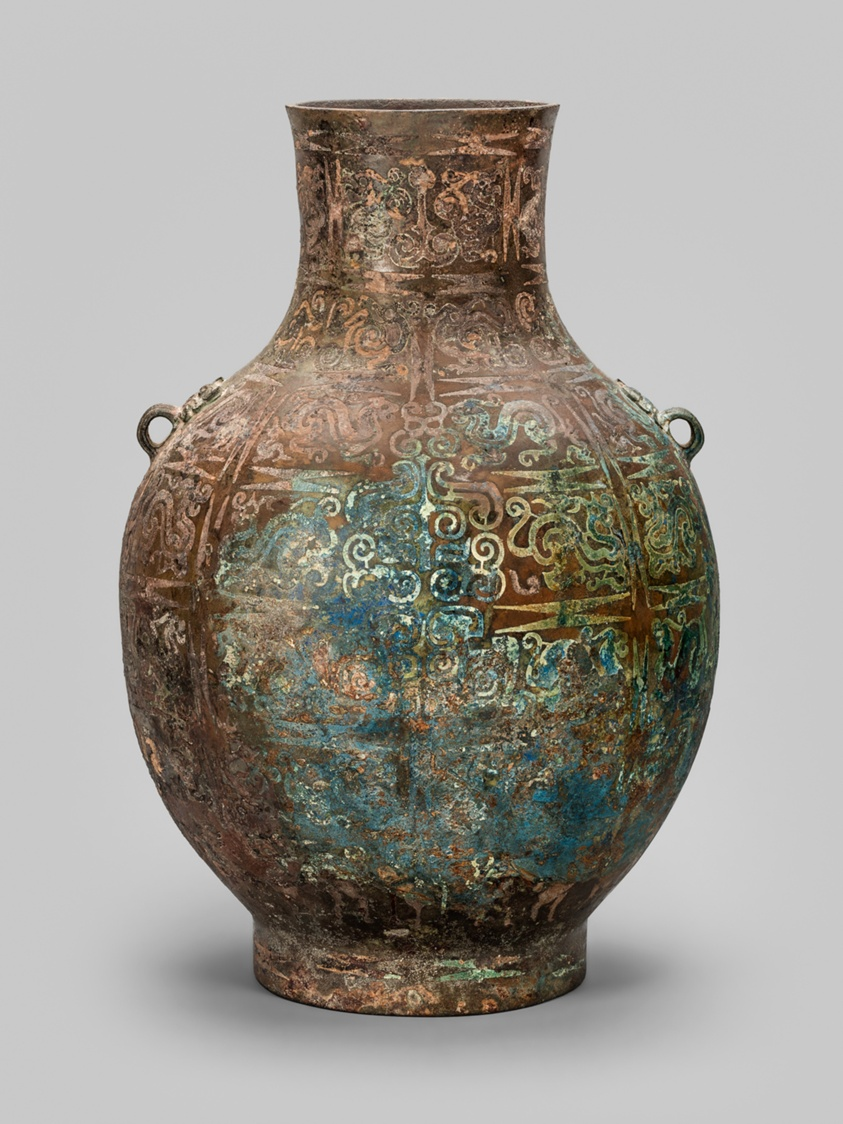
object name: Vessel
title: Jar (hu)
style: Chinese (culture or style)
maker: China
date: Eastern Zhou dynasty, Warring States period (475–221 B.C.)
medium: Bronze inlaid with copper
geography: China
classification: bronze; metal; vessel; asian art